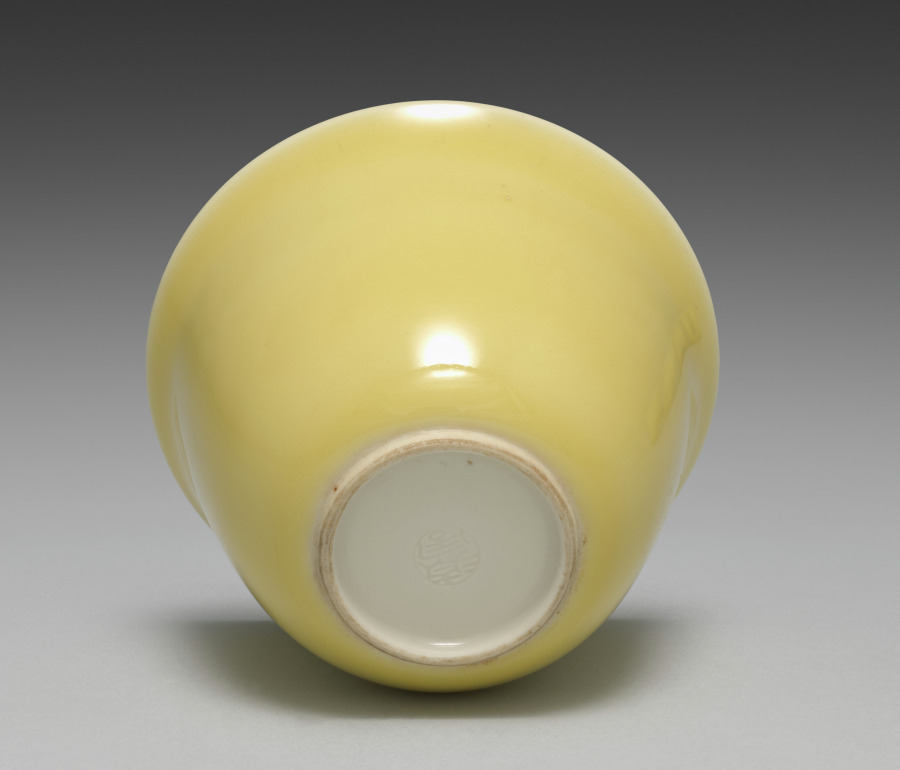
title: Cup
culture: Japan, Taishō period (1912–26) or Shōwa period (1926–89)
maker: Seifū Yohei IV (Japanese, 1872–1951)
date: 1914–46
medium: porcelain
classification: Ceramic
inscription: 清風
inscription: 清風造 【印】成山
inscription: 清風盧人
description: Like his father, Yohei IV also produced works with red or yellow monochrome glazes. His yellow-glazed works include this set of five drinking cups, a pair of sake pourers CMA 2022.216, and a sweets bowl molded into the shape of a chrysanthemum CMA 2022.218.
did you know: Seifū Yohei IV learned the ceramics industry from his father and painting from Tanomura Shosai.